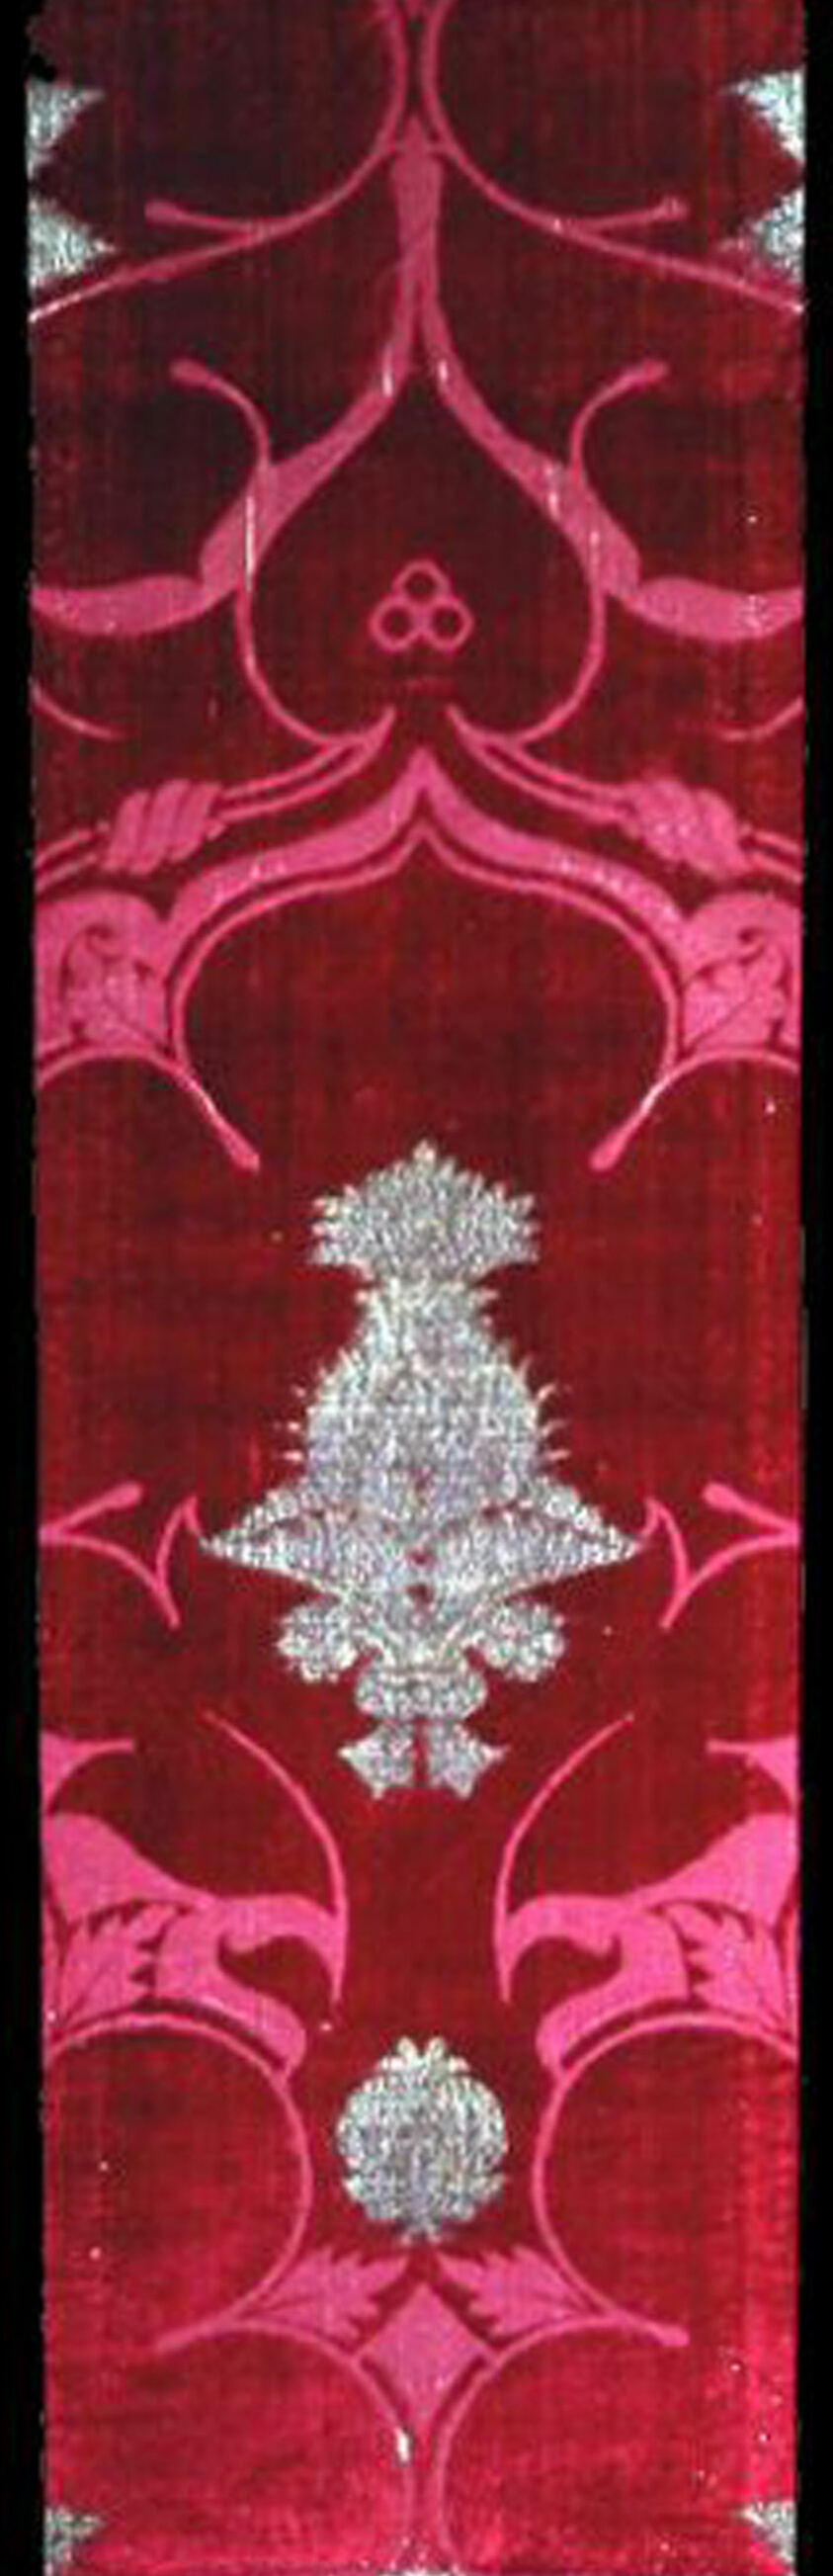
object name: Textile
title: Panel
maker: Italy, possibly Venice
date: 1425/75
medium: Silk and gilt-metal-strip wrapped silk, warp-float faced 4:1 satin weave with supplementary brocading wefts bound by main warps in weft-float faced 1:4 'Z' twill interlacings and supplementary pile warps forming cut, voided velvet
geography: Italy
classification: textile; weaving - velvet